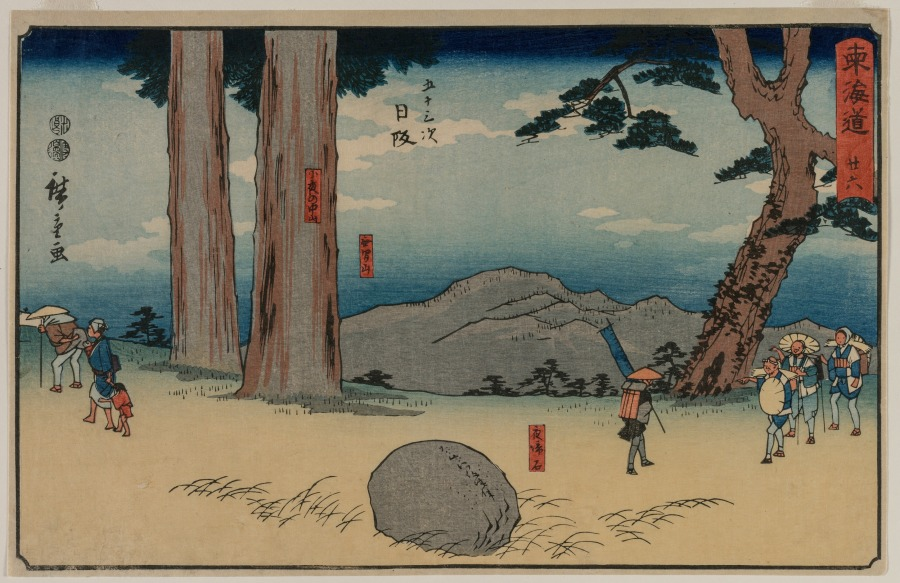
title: Nissaka: The Night-Weeping Stone at Sayo no Nakayama, from the series The Fifty-Three Stations of the Tōkaidō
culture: Japan, Edo period (1615–1868)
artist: Utagawa Hiroshige (Japanese, 1797–1858)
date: c. 1848–50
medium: Color woodblock print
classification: Print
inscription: Signature: Hiroshige ga Publisher: Maruya Seibei Censorship Seal: Mera, Watanabe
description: This print is an image of a mountain pass in Nissaka, one of the stops along the Tōkaidō, a road running from Kyoto to Edo (present-day Tokyo). This scene alludes to a legend in which bandits murdered a pregnant woman on that stretch of road, and her blood fell upon a stone. Shown in the foreground, the stone is said to contain the woman’s spirit, and so it weeps each night. In some versions of the story, the stone’s cry alerts a passing monk (really the disguised bodhisattva Kannon) to the presence of her infant, who survived the attack. The monk takes the child from the deceased mother’s body, and raises it as his own. The child goes on to avenge its mother.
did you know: This print belongs to a series known colloquially as the “Formal Script Tōkaidō” because of the style of text in which the name of the series is printed.